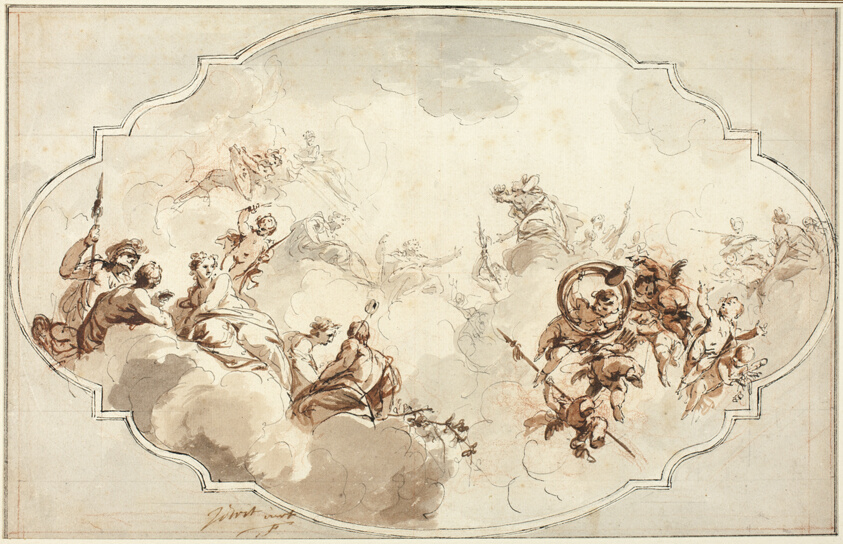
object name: Drawing and Watercolor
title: Design for a Ceiling: Apotheosis of Callisto or Diana (recto), and Sketch of Figures (verso)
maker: Jacob de Wit (Dutch, 1695-1754)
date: 1731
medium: Pen and black ink, with brush and gray and brown wash, over red chalk, partially squared in graphite and red chalk (recto), and red chalk (verso), on ivory laid paper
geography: Holland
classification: drawings (visual works); prints and drawing